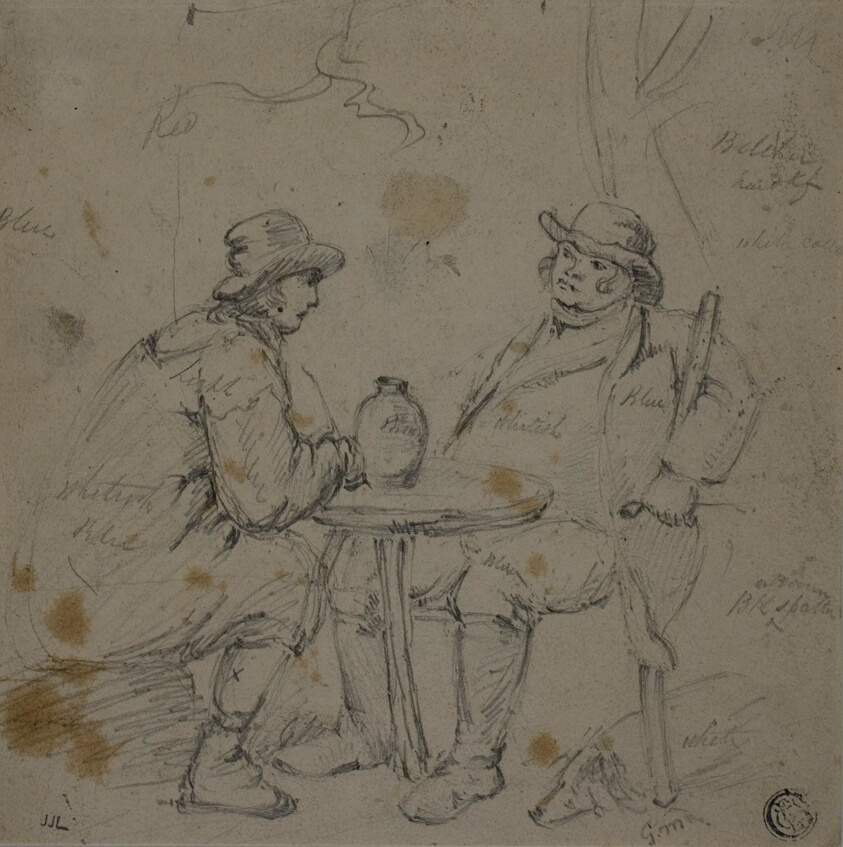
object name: Drawing and Watercolor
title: Two Men at a Table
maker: Possbily after George Morland; English, 1763-1804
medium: Graphite on cream wove paper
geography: England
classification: graphite; drawings (visual works); prints and drawing